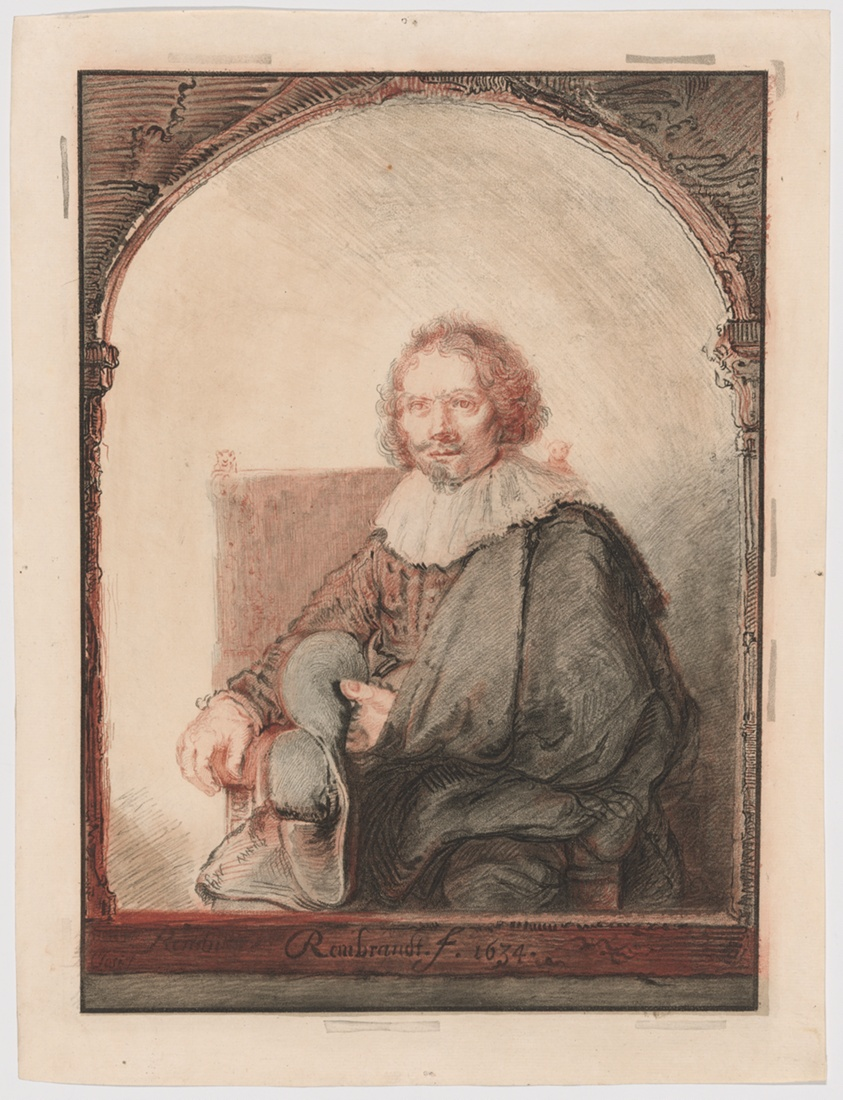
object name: Print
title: Portrait of a Man in an Armchair, from Collection d'imitations de Dessins d'après les Principaux Maîtres Hollandais et Flamands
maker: Christian Josi (Dutch, died 1828); after Rembrandt van Rijn (Dutch, 1606-1669)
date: 1826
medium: Soft ground etching, hard ground etching, aquatint, and roulette, printed from two plates in red-brown and black on white laid paper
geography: Holland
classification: etching; print; prints and drawing